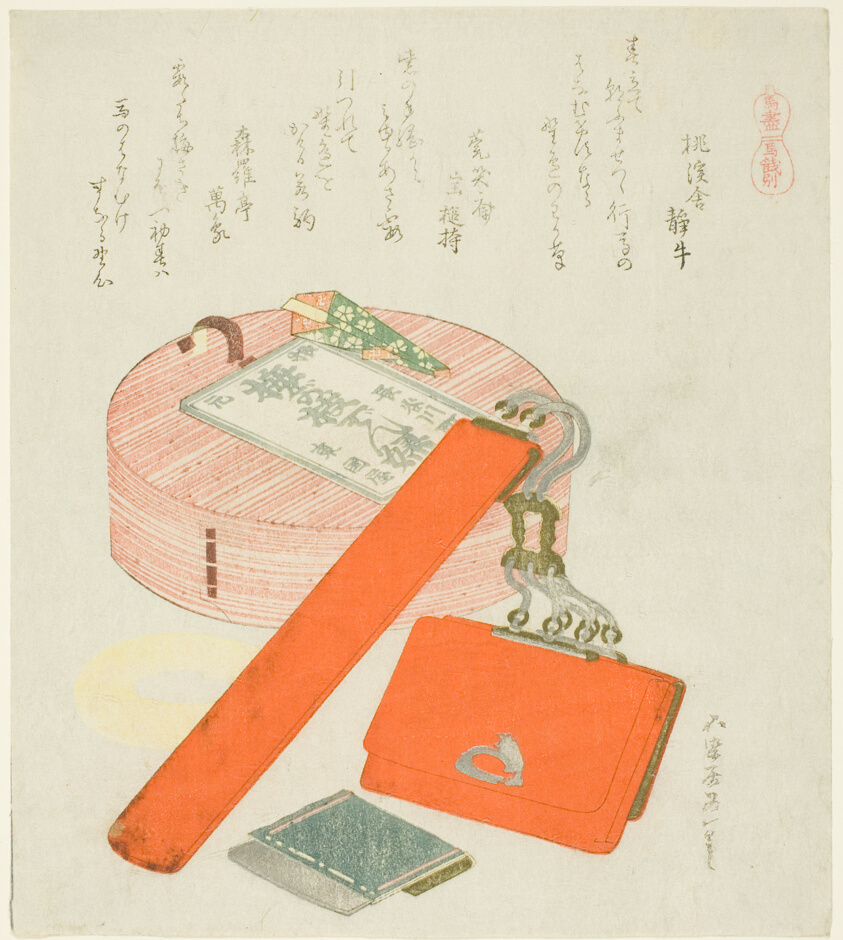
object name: Print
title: Farewell Gift for the Horse (Uma no Senbetsu), from the series "A Selection of Horses (Uma-zukushi)"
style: Japanese (culture or style)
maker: Katsushika Hokusai 葛飾 北斎; Japanese, 1760–1849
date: 1822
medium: Color woodblock print; shikishiban, surimono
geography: Japan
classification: woodblock print; print; asian art